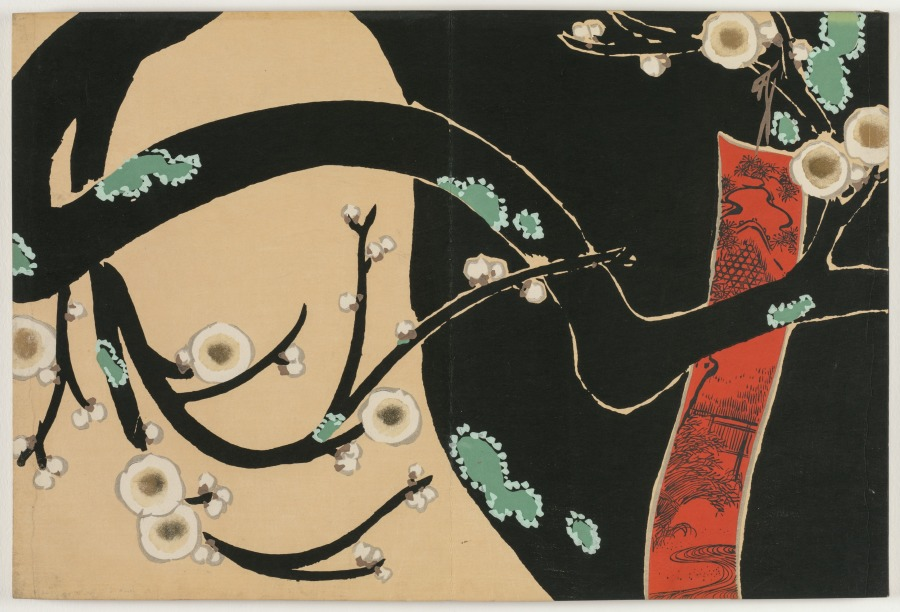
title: Flowers of a Hundred Worlds (Momoyogusa): Plum (Ume)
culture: Japan, Meiji period (1868–1912)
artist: Kamisaka Sekka (Japanese, 1866–1942)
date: 1909–10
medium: color woodcuts with gold and silver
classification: Bound Volume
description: This print from a set of three woodblock printed albums displays the graphic design prowess of Kamisaka Sekka. The images were first distributed one by one to subscribers to the series but later were reissued in bound form, like this book, for mass consumers. Each print features a vignette taken from nature or Japanese literature. Many of the scenes have a long history in Japan, originating in the 900s or 1000s and having been interpreted by all manner of artists since that time. Sekka’s selections hew closely to precedents from the Rinpa style originated by painter Tawaraya Sōtatsu (c. 1570–c. 1640) and calligrapher Hon’ami Kōetsu (1558–1637).